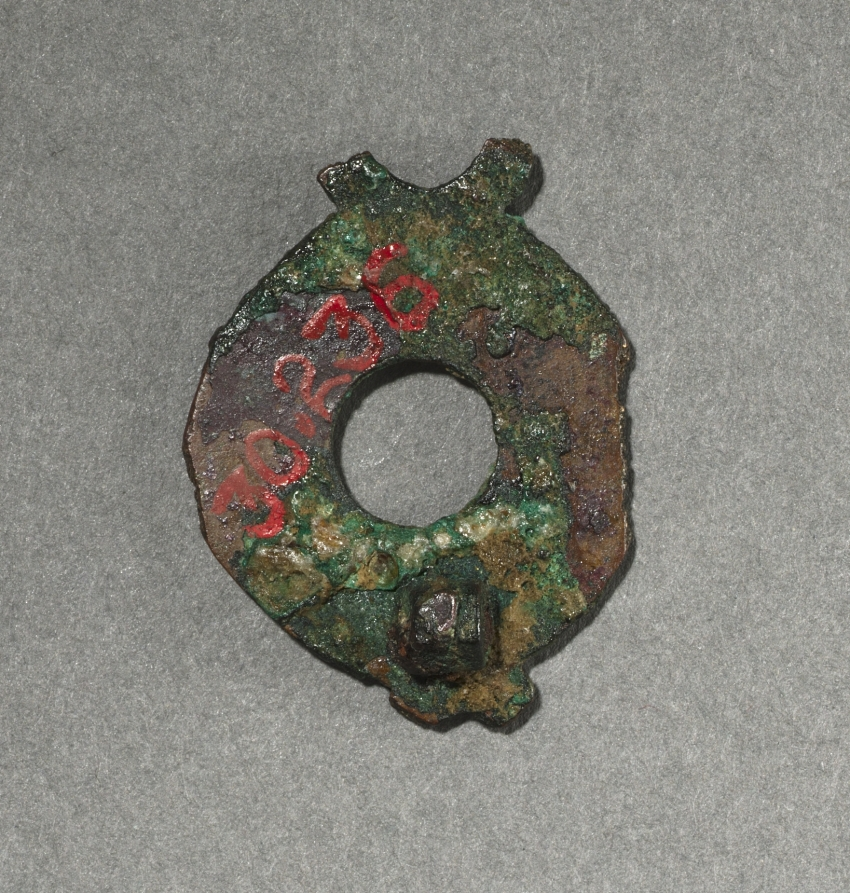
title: Ornamental Brooch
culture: Gallo-Roman or Romano-British, Migration period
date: c. 100–300 CE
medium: bronze and champlevé enamel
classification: Jewelry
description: These brooches functioned as garment clasps (much like the generally larger fibulae) and are distinctive for their decorative enamels. The art of enameling was highly popular among the conquered peoples who lived on the outskirts of the Roman empire, chiefly the Celts and the Gauls. Though the enameling technique was practiced by the Romans themselves on small objects, the brightly colored decoration readily appealed to "barbarian" taste. By the AD 200s, enameled brooches like these were being made in abundance by the native peoples of Britain and Gaul (modern France and Belgium).